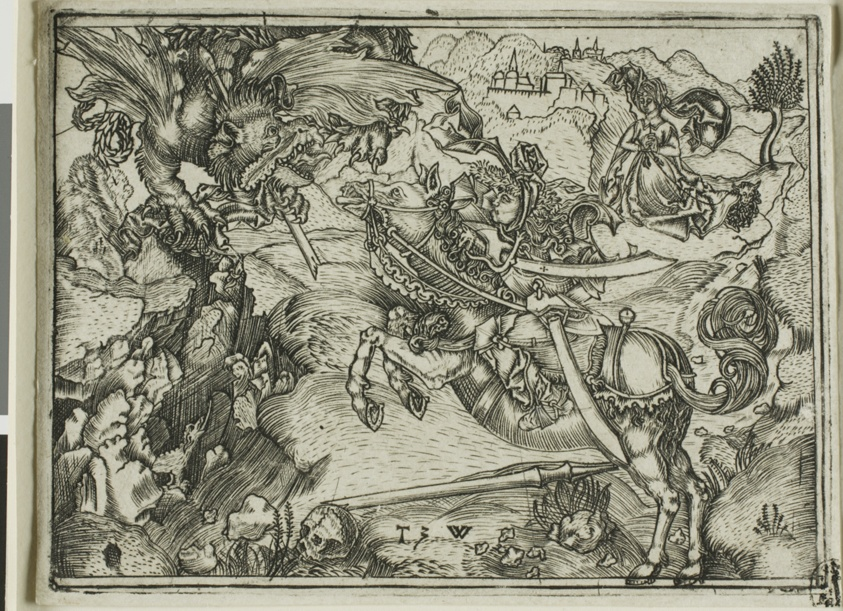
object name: Print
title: St. George Killing The Dragon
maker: Telman of Wesel (German, active 1490-1510)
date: 1499–1510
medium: Engraving in black on ivory laid paper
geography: Germany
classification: engraving; print; prints and drawing